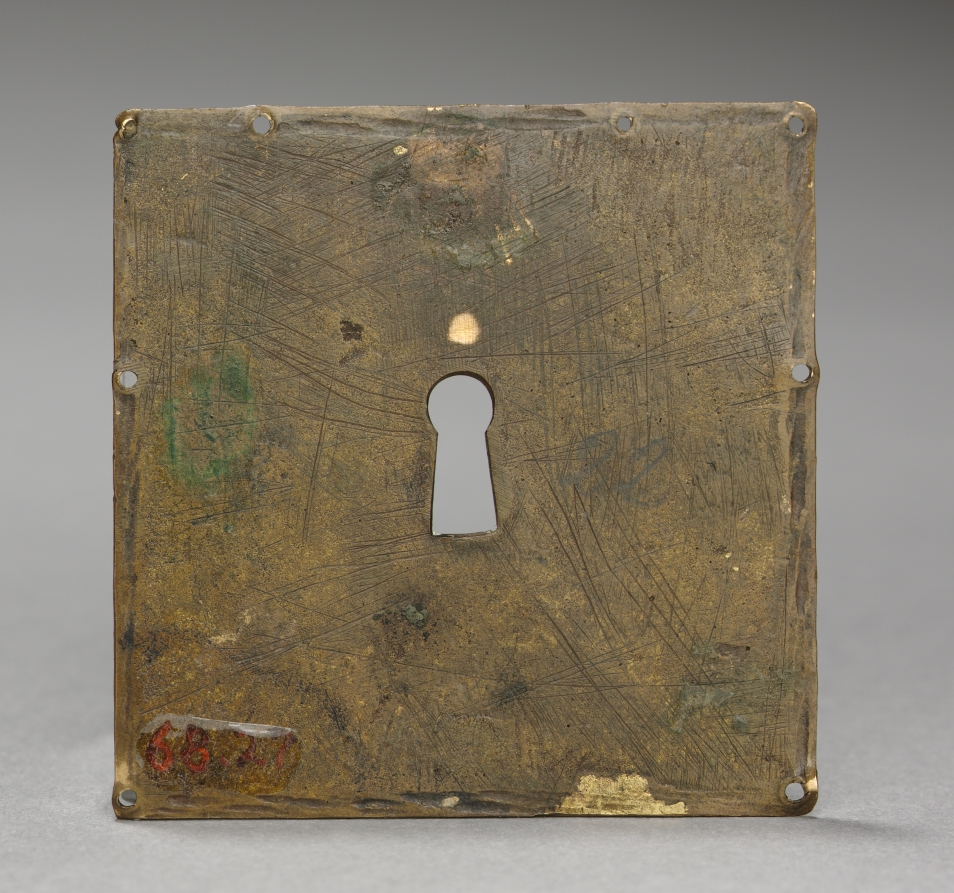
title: Christ and the Woman Taken in Adultery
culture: Italy, 16th century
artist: cast after a model by Valerio Belli (Italian, c. 1468–1546)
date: c. 1535 or later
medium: gilt bronze (later perforated with a keyhole)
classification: Sculpture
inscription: inscribed on the architrave: VALERIVS VI F.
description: In the Gospel of John, a group of scribes and Pharisees, following the law of the Ten Commandments, intends to stone a woman who has committed adultery. The group first asks Christ's opinion of their actions, hoping to accuse him of heresy, but Christ ignores them by writing on the ground. When they persist Christ tells them, "He who is without sin among you, let him first cast a stone at her." First and foremost a gem and rock crystal engraver, Belli's plaquettes are often casts made from designs he had already made in rock crystal. This work was cast after one of 24 carved rock crystal scenes from the life of Christ that adorned a silver gilt casket Belli created for Pope Clement VII in 1532. The keyhole cut into this plaquette was added later.